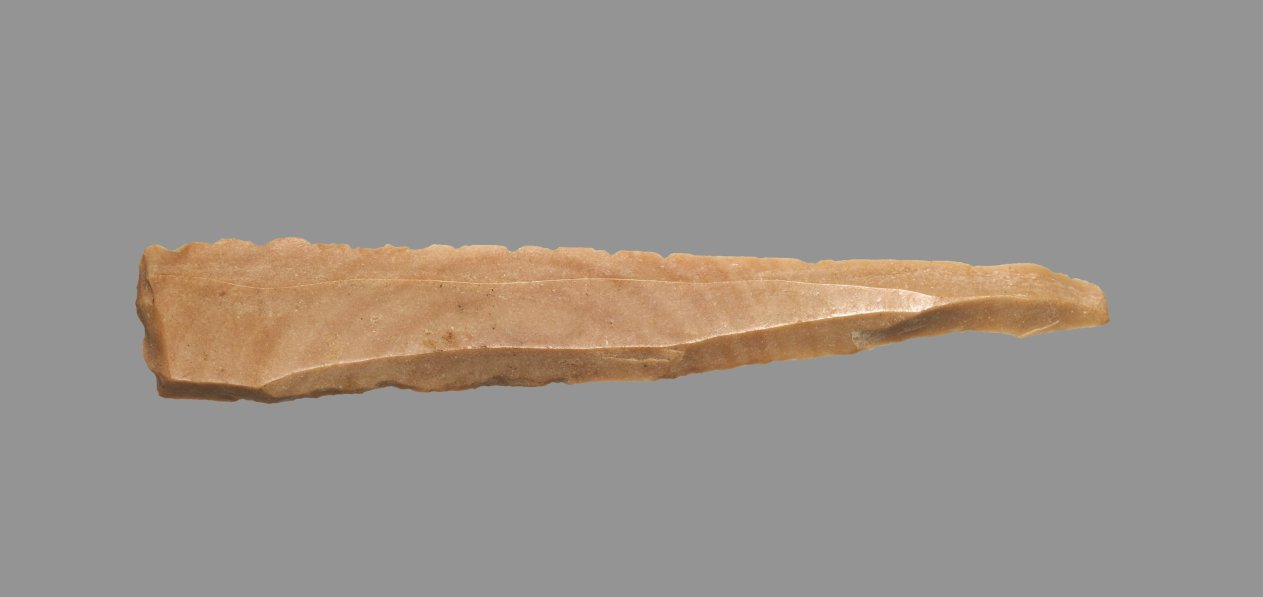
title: Sickle Blade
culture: Egypt, Middle Kingdom (2040–1648 BCE), Dynasty 12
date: 1980–1801 BCE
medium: flint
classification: Implements